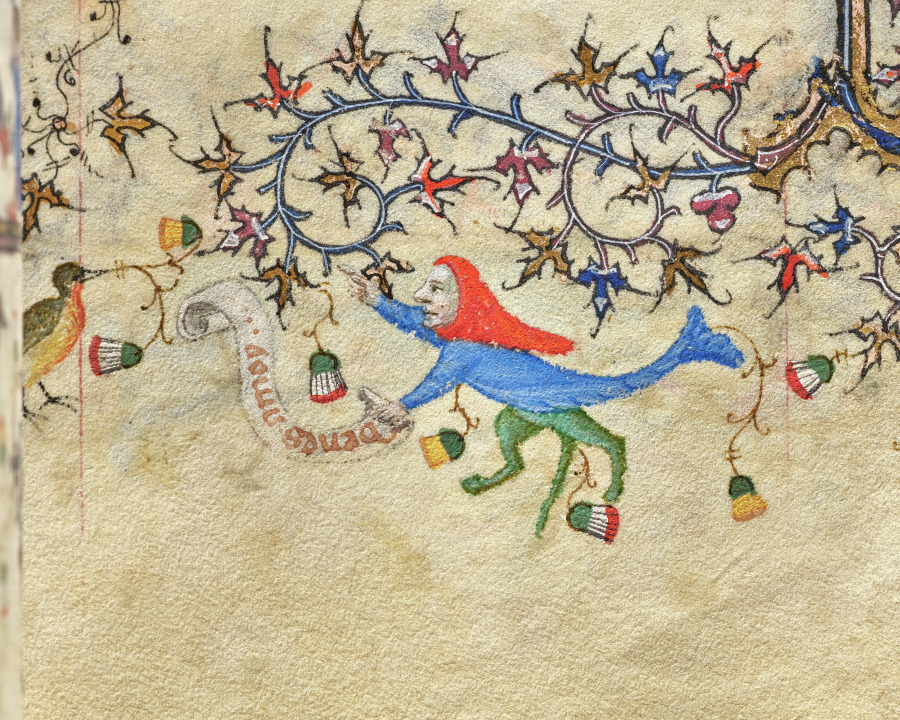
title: Hours of Charles the Noble, King of Navarre (1361-1425): fol. 107r, Text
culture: France, Paris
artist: Master of the Brussels Initials and Associates (French)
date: c. 1405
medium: ink, tempera, and gold on vellum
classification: Bound Volume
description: This precious volume was obviously highly prized by its owner, the French-born King of Navarre, who had his coat of arms painted on no less than twenty folios. Rather than directly commissioning this manuscript from a specific workshop, it seems that Charles the Noble acquired his book of hours -- perhaps ready-made for the luxury market -- while on a trip to Paris in 1404-05. A collaborative effort, six painting styles are evidenced within the pages of this codex, those of two Italians, two Frenchmen, and two Netherlanders. The painter who was responsible for the planning and decoration of the book, and who produced seventeen of the large miniatures, was a Bolognese artist known as the Master of the Brussels Initials. His principal assistant, responsible for most of the borders, was a Florentine who signed his name "Zecho" da Firenze on folio 208 verso.